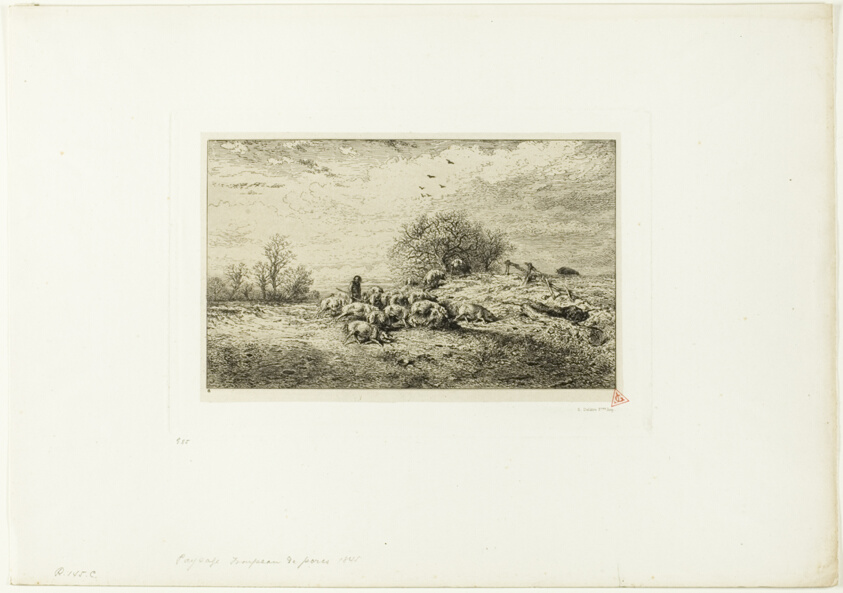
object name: Print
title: Landscape with Herd of Pigs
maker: Charles Émile Jacque (French, 1813-1894)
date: 1845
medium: Etching on cream China paper laid down on ivory wove paper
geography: France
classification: etching; print; prints and drawing